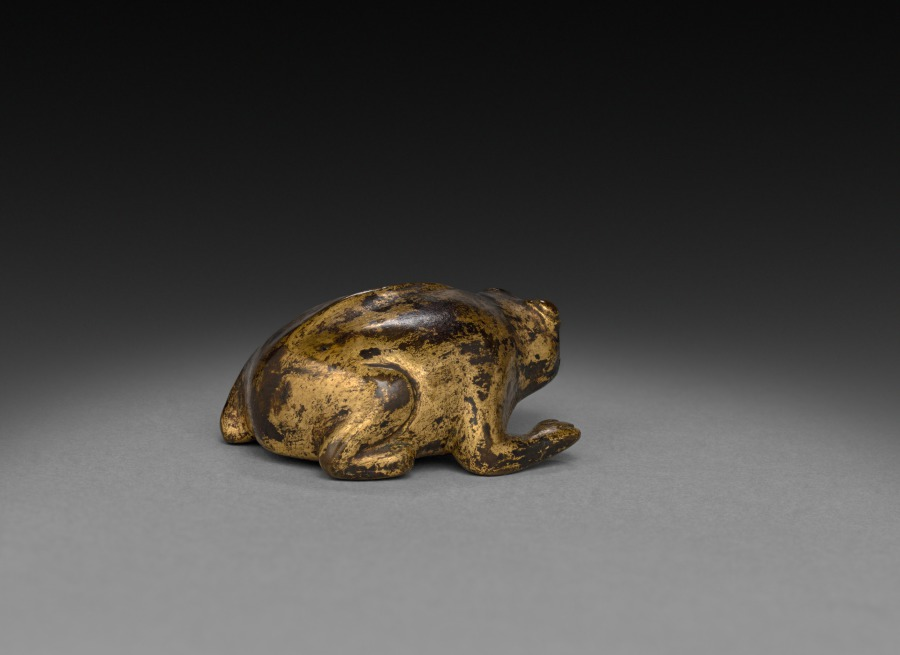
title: Toad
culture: China, Six Dynasties period (317-581), Northern Wei dynasty (386-534)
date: 386–534 CE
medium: gilt bronze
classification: Sculpture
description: In China, access to political power was granted to those who passed the civil service examinations, a system that offered official service only at a high level of education. Chinese literati-officials whose daily routine was administrative work in an office, enjoyed precious objects on their writing desks that offered distraction and demonstrated good taste. By the Ming (1368–1644) and Qing (1644–1911) dynasties, these utensils of the literati studio became also collectibles and were treasured as artworks. Desk objects included paper weights, like this bronze frog, seals, seal paste boxes, brush rests, wrist rests, brush holders, water droppers, ink cakes, miniature mountains, and albums, all ranging in material from jade, gilt bronze, lacquer, and wood to porcelain.